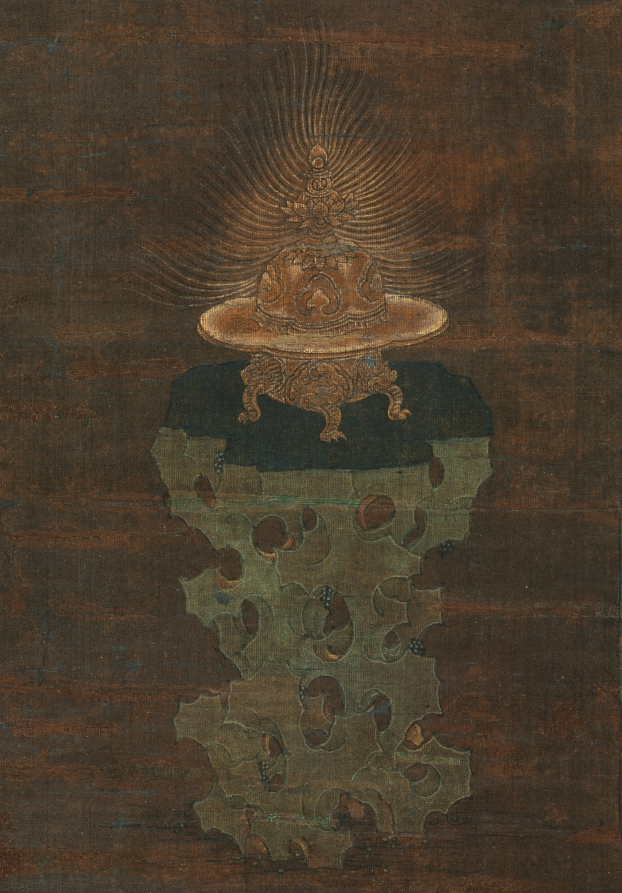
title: Shakyamuni Triad: Buddha Attended by Manjushri and Samantabhadra (Buddha)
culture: China, Fuzhou, Fujian Province, Yuan dynasty (1271-1368)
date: late 1300s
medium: Hanging scroll; ink and color on silk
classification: Painting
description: This triptych is a rare example of Yuan Buddhist painting. It depicts the historic Buddha Shakyamuni flanked by two attending bodhisattvas, Manjushri (the bodhisattva of wisdom, riding a lion) and Samantabhadra (the bodhisattva of universal virtue, riding an elephant). Below them are others seeking enlightenment: two disciples of the Buddha (Ananada and Kasyapa), two non-Chinese people, a boy with topknots, and a female worshiper. The clouds above and around the divine beings form one scene that illustrates Shakyamuni’s sermon from the Lotus Sutra. This text became an important basis for Buddhist faith throughout East Asia and was central to the Mahayana school of Buddhism.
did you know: Shakyamuni is seated cross-legged on the throne with the hand gesture (mudra) of giving instruction.